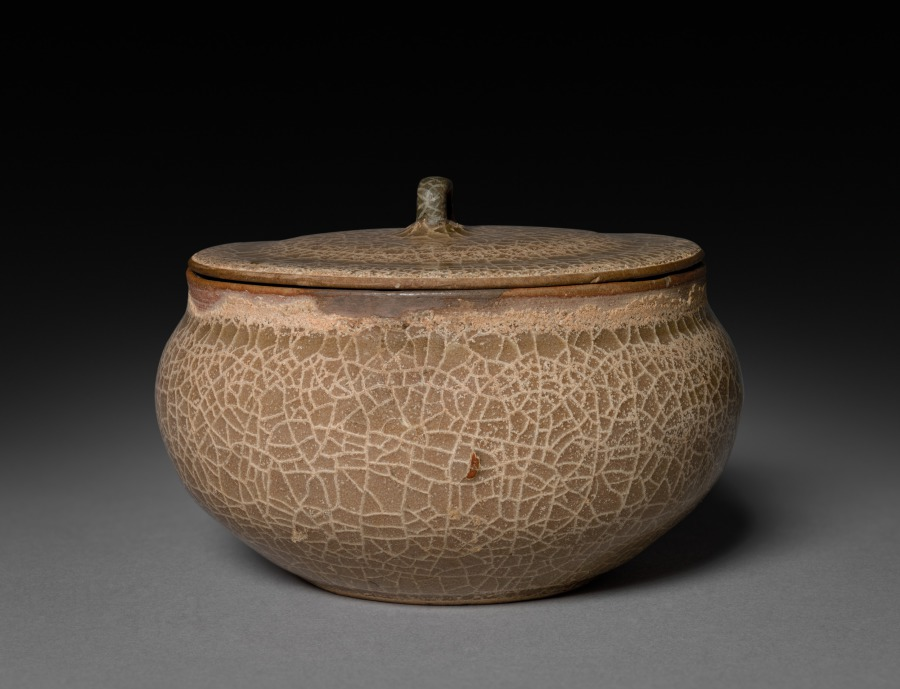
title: Covered Flat Jar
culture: China, Hangzhou, Suburban Altar Kiln, Southern Song dynasty (1127-1279)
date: 1127–1279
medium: glazed buff stoneware, Guan ware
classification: Ceramic